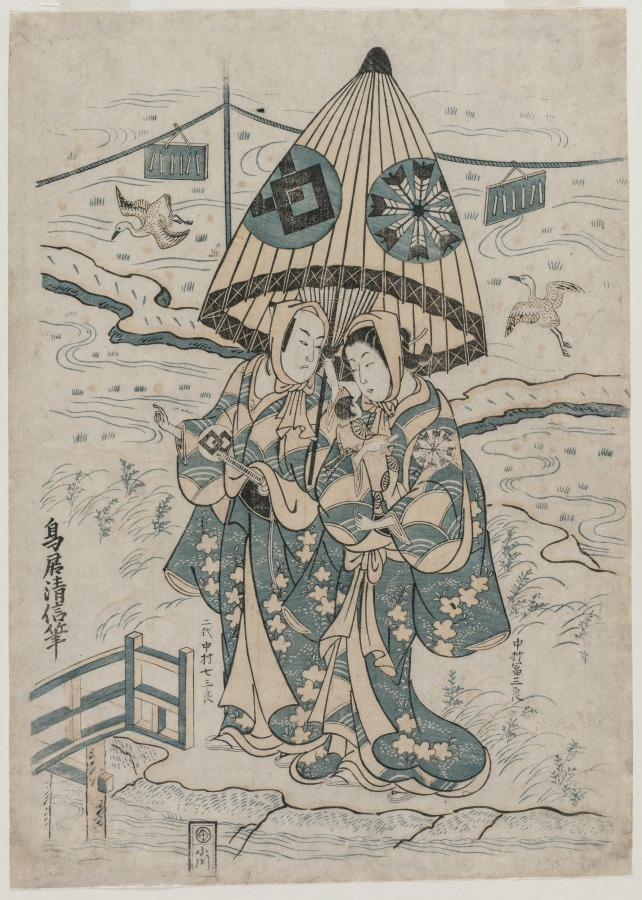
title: Nakamura Tomijuro and Nakamura Shichisaburo II as the Lovers Agemaki and Sukeroku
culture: Japan, Edo period (1615–1868)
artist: Torii Kiyonobu II (Japanese, 1706–1763)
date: 1753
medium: color woodblock print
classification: Print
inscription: Signature: Torii Kiyonobu hitsu Publisher: Ogawa (emblem)